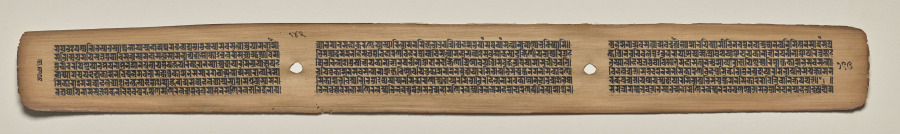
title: Text, Folio 142 (verso), from a Manuscript of the Perfection of Wisdom in Eight Thousand Lines (Ashtasahasrika Prajnaparamita-sutra)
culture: Eastern India, Bihar, Vikramashila Monastery. Painting: Nepal, Kathmandu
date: Sunday, September 14, 1119 (year 239 of the Newar Samvat in the month of Ashvina)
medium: gum tempera and ink on palm leaves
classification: Painting